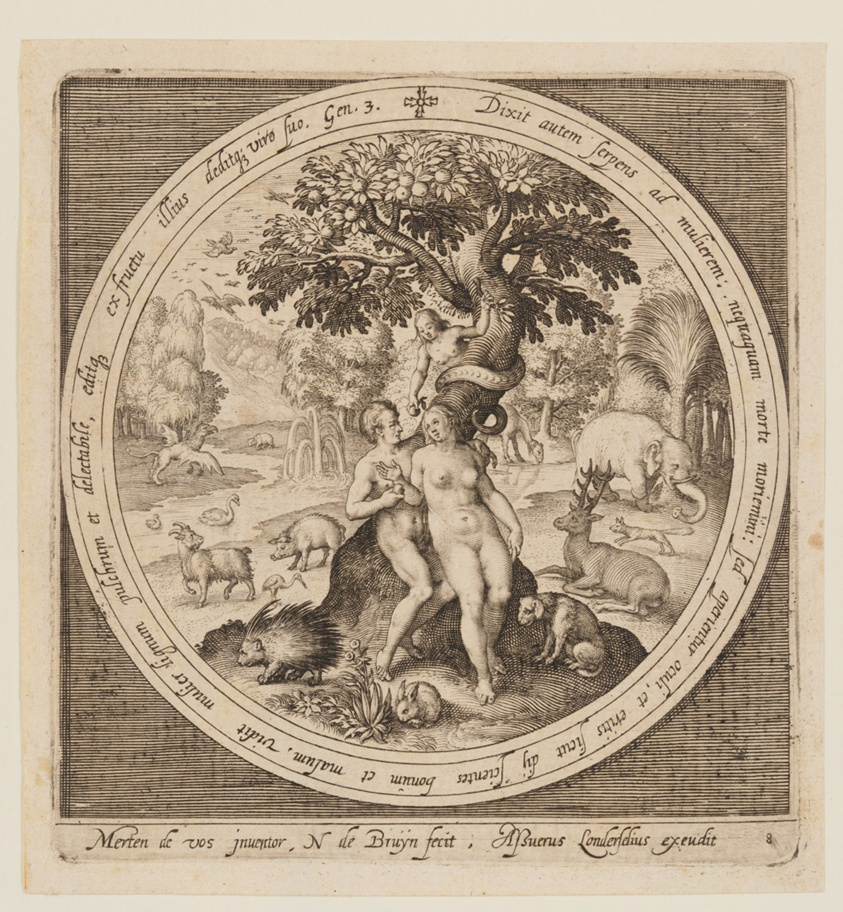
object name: Print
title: The Temptation of Eve, from The Creation to the Expulsion from Paradise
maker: Nicolaes de Bruyn (Flemish, 1571–1656); after Maarten de Vos (Flemish, 1532–1603)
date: c. 1610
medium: Engraving on ivory laid paper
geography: Flanders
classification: engraving; paper; print; prints and drawing